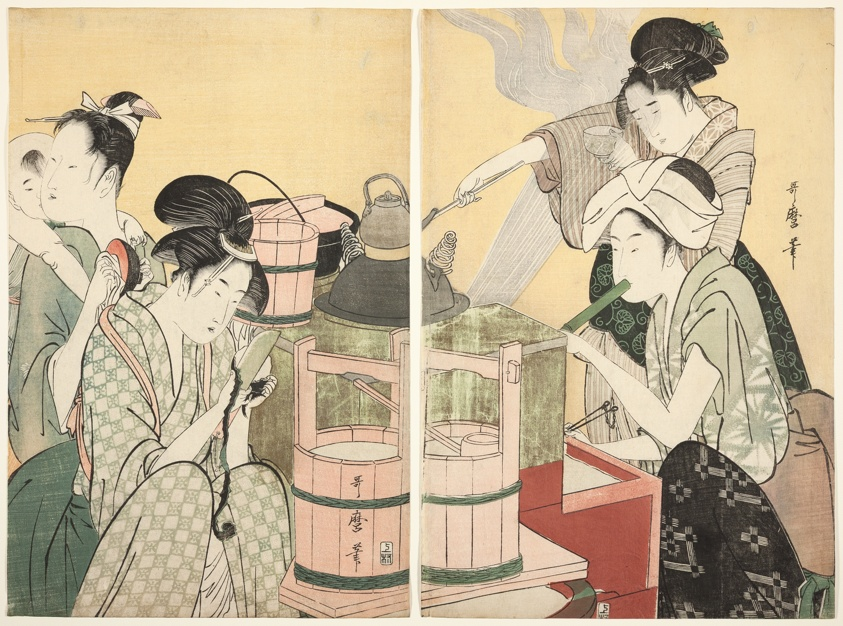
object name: Print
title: Kitchen Scene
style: Japanese (culture or style)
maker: Kitagawa Utamaro 喜多川 歌麿; Japanese, 1753 (?)-1806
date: c. 1794/95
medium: Color woodblock print, oban diptych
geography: Japan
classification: woodblock print; print; asian art